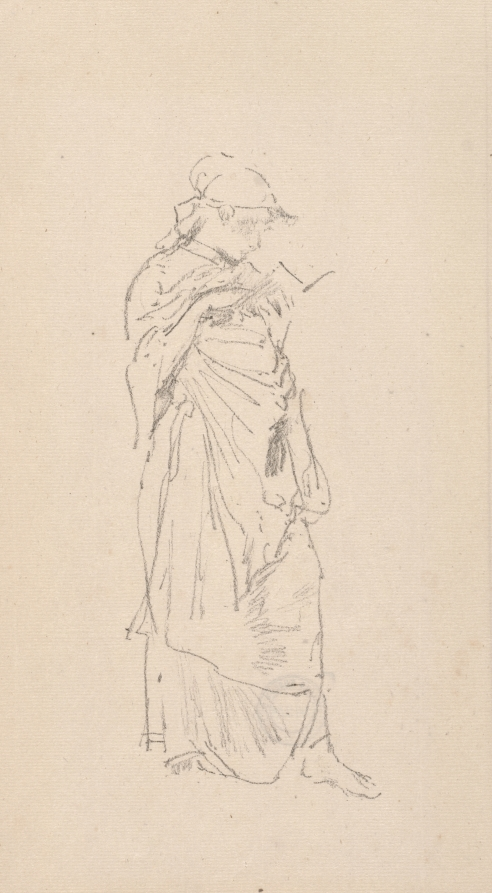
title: The Novel - Girl Reading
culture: America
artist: James McNeill Whistler (American, 1834–1903)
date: 1890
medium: lithograph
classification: Print